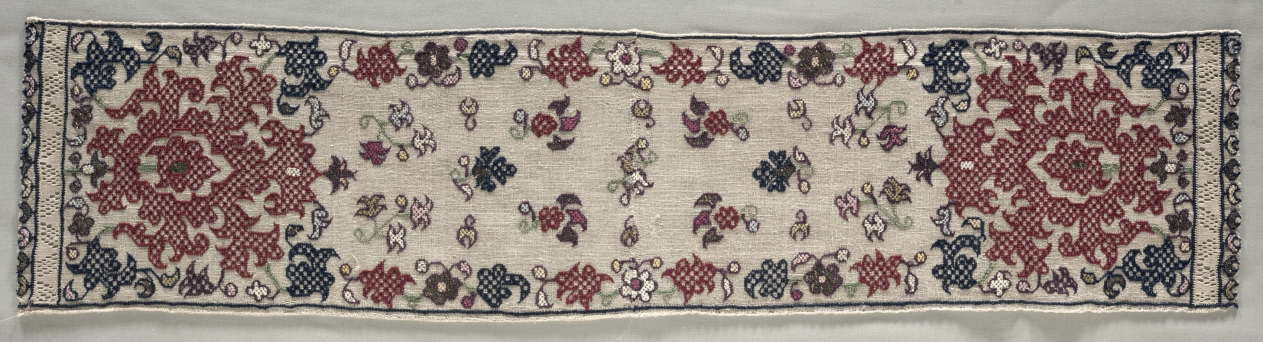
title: Part of a Cap (beniqa)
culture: Africa, North Africa, Algeria, Algerian embroiderer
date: 1700s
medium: Linen, silk, metal, dye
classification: Embroidery